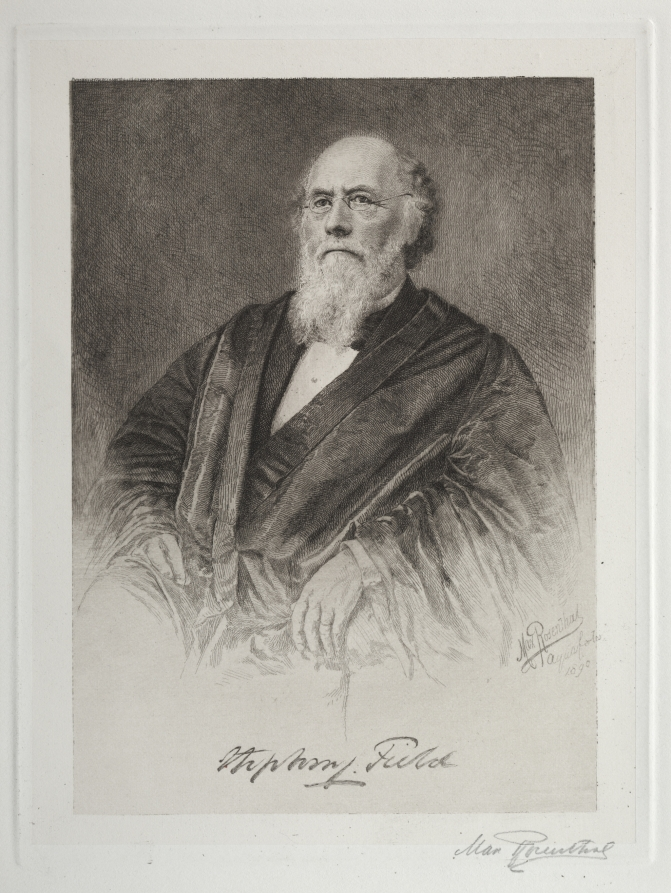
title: Stephen Field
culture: America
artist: Max Rosenthal (American, 1833–1918)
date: 1890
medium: etching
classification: Print